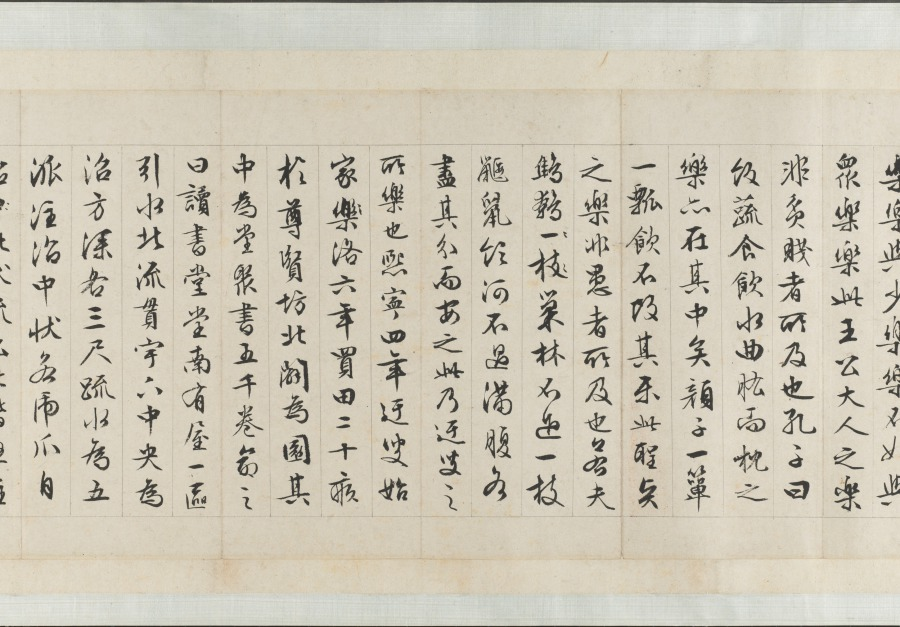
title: Garden for Solitary Enjoyment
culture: China, Ming dynasty (1368–1644)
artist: Qiu Ying (Chinese, 1494–1552)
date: 1515–52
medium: Handscroll; ink and light color on silk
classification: Painting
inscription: Accompanying text of an essay together with seven poems of Sima Guang (1019–1086) and one poem of Su Shi (1037–1101) written by Wen Zhengming (1470–1559) in 1558.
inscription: 2 colophons and 82 seals: 4 seals of Wen Zhengming 文徵明 (1470–1559); 59 seals of Xiang Yuanbian 項元汴 (1525–1590); 1 colophon, dated 1644, and 7 seals of Xiang Yukui 項禹揆 (c. late 1500s–1659); 1 colophon, dated 1880, and 2 seals of Weng Tonghe 翁同龢 (1830–1904); 2 seals of Ch'eng Chen-i (19th c.); 1 seal of Han Ch'ung (19th c.); 4 seals of Wan-go H. C. Weng 翁萬戈 (1918–2020); 3 seals unidentified.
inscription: Colophon by Xiang Yukui 項禹揆 (c. late 1500s–1659): The painting of The Garden for Self-enjoyment on the right by Shih-chou, Mr. Qiu [Qiu Ying] is in the style of Li Lung-mien. Its mood is peaceful, as if meeting the ancient gentlemen face to face among the brushes and silk; it lifts one above the sordid bustle of life. Formerly, my late father handed me this scroll which had only the painting without the written essay. I considered asking a good calligrapher to write the essay to add to it but was afraid that the quality of the writing would not match the painting. Several years later, I saw at a friend's house this essay and poems (of Ssu-ma Kuang] written by Hengshan [Wen Zhengming], once owned by my grandfather; so I spared no expense to obtain it. I rejoiced at this and said: "The divine swords are finally united. How things are pre-destined!" Now my friend Chang Kung-chao's technique for mounting [painting and calligraphy] is excellent. Therefore by daring to take them out and join them together, I can preserve this beautiful story of singular reunion. Xiang Yukui recorded at Hai-yeh-t'ang [hall] two days before New Year's Eve in the jiasheng year of the Chongzhen era [1644]. trans. LYSL/HK/WKH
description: Garden of Solitary Enjoyment refers to a site built in 1073 by the statesman Sima Guang (1019–1086) after he had retired to Luoyang, Henan province. Every spring, visitors would flock to his garden. Each of its seven structures references a historic figure. Sima wrote: I channel streams [like Du Mu], to water flowers [like Bai Juyi], or trim bamboo [like Wang Huizhi]. . . . I know of no joy between heaven and earth that could take its place. Qiu Ying’s painting, created after an 11th-century version of the same theme, must have appealed to garden owners of the Ming dynasty, since it became the template for numerous Suzhou workshop copies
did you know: Sima Guang completed his monumental survey of Chinese history, Zizhi tongjian, in the garden depicted in this painting.